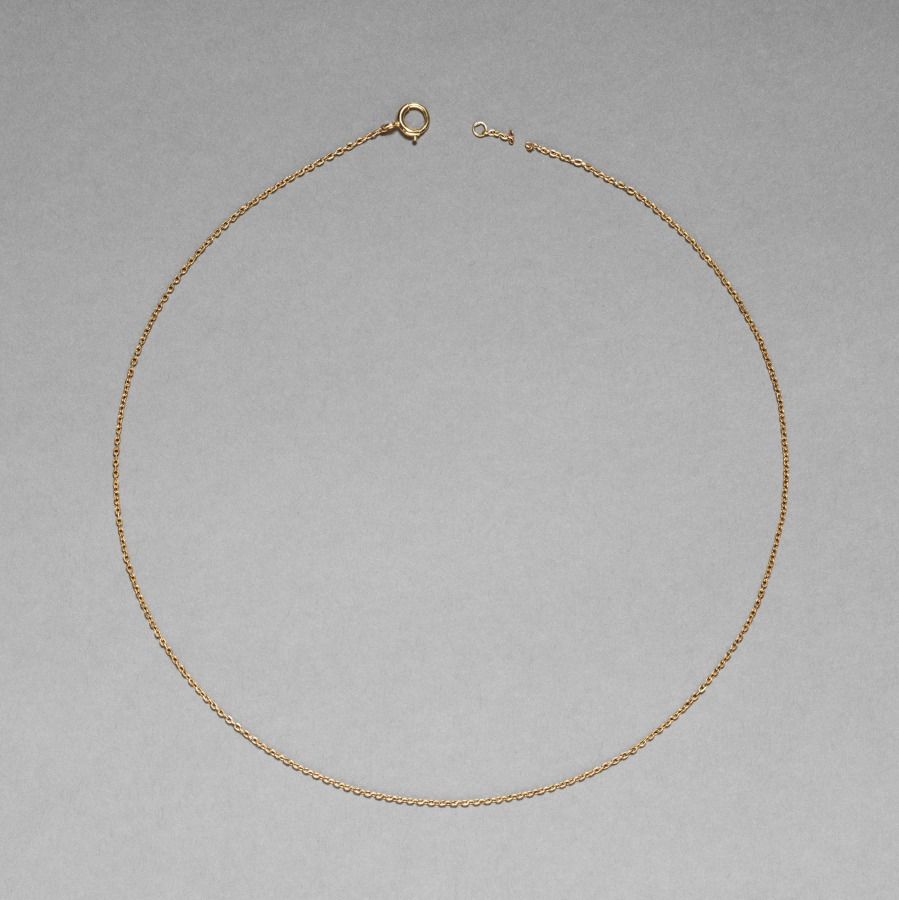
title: Chain for Pendant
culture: Unassigned, 20th century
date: 1900s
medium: 14k gold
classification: Jewelry